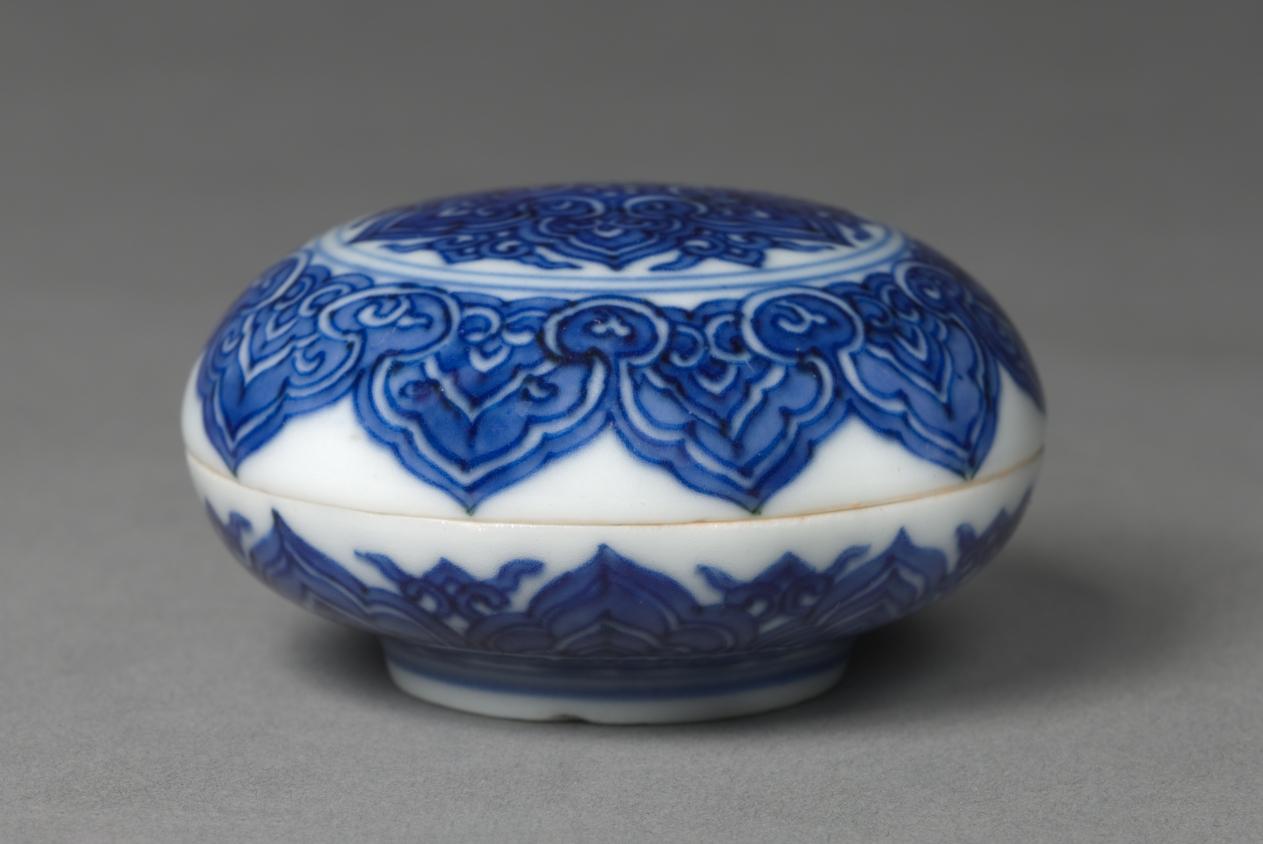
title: Round Covered Box with Medallions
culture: China, Jiangxi province, Jingdezhen kilns, Ming dynasty (1368-1644), Jiajing mark and reign (1522-66)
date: 1522–66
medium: porcelain with underglaze blue decoration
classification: Ceramic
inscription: 大明嘉靖年製